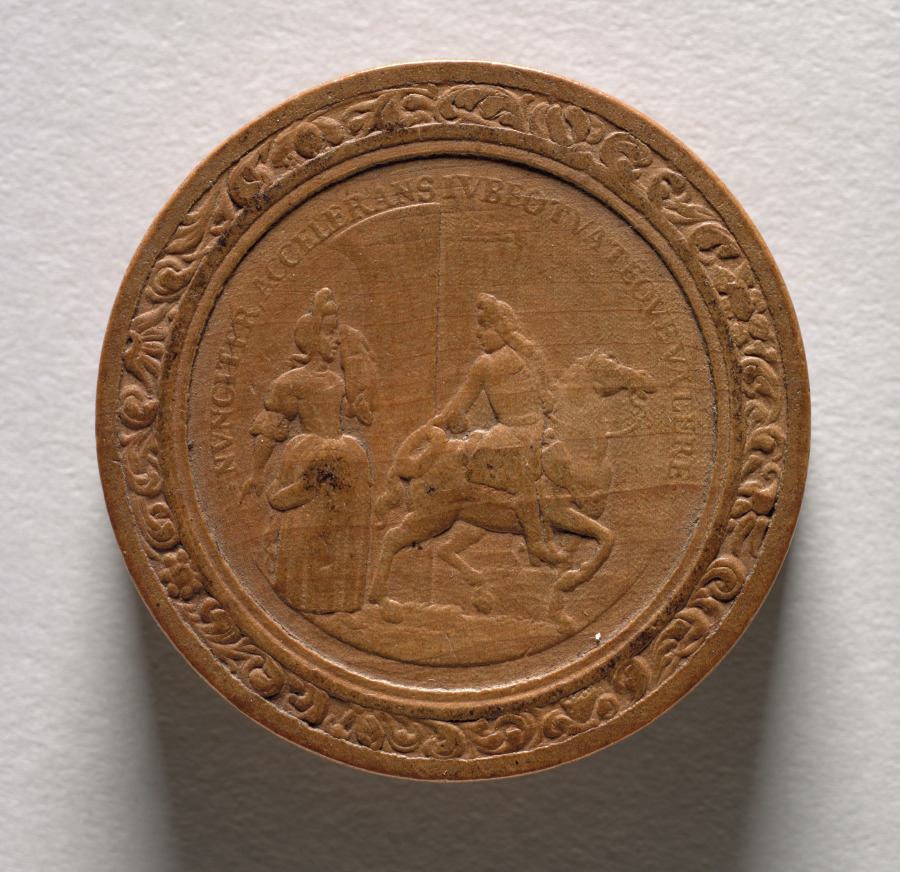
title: Gaming Piece (obverse)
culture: Germany, late 17th-early 18th Century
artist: Martin Brunner (German, 1659–1725)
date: c.1700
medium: wood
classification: Furniture and woodwork